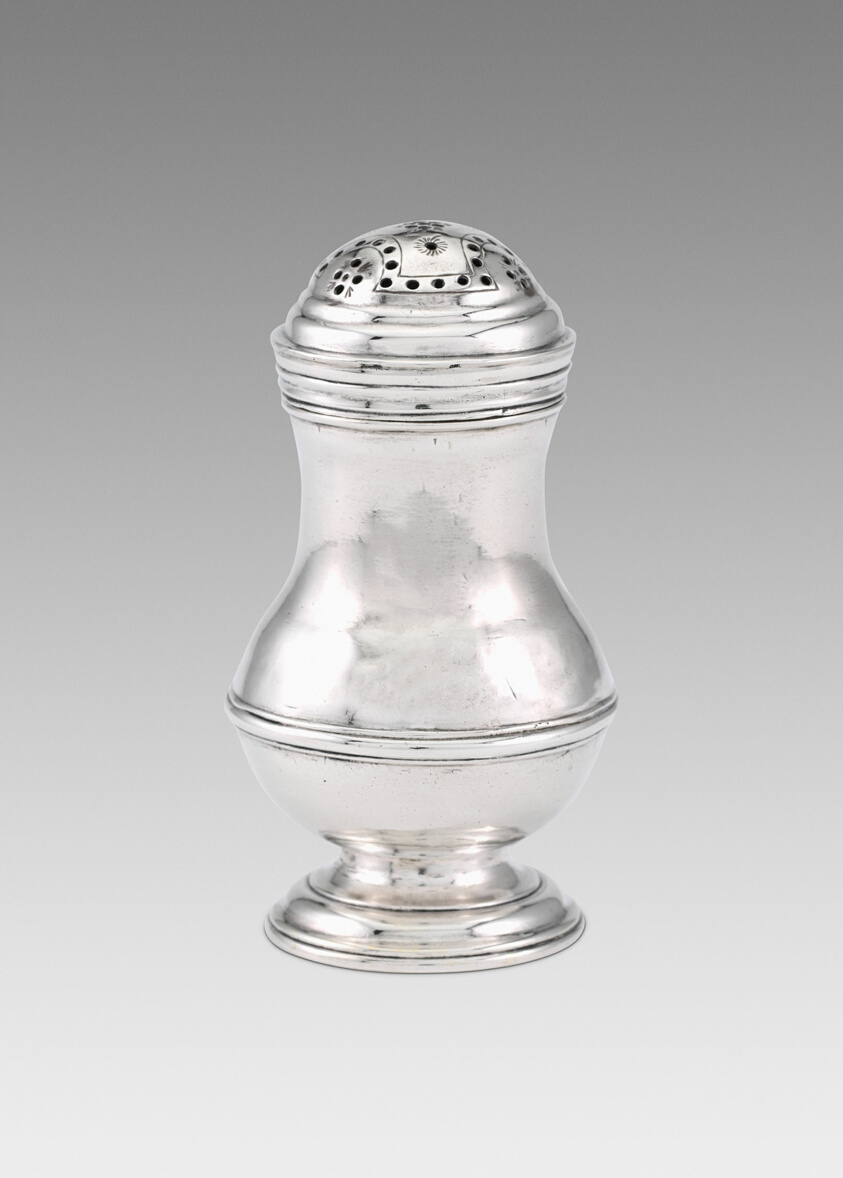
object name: Metalwork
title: Caster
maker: Jacob Hurd; American, 1702/03–1758; Boston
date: 1731–40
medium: Silver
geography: Boston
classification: condiment vessel; silver; american decorative arts; american arts; decorative arts